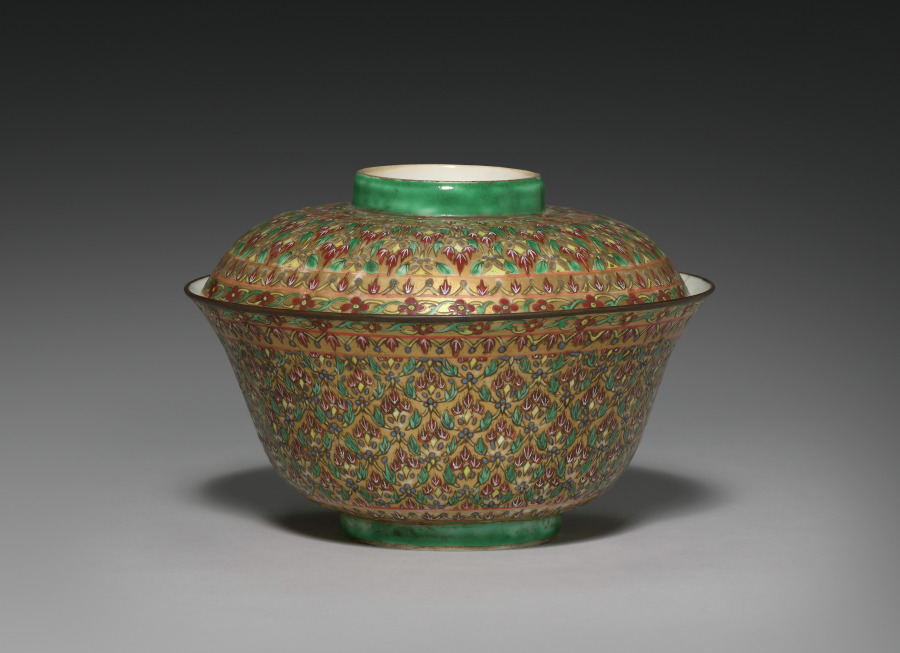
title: Chow Bowl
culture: Siam, 18th century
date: 1700s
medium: porcelain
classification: Metalwork